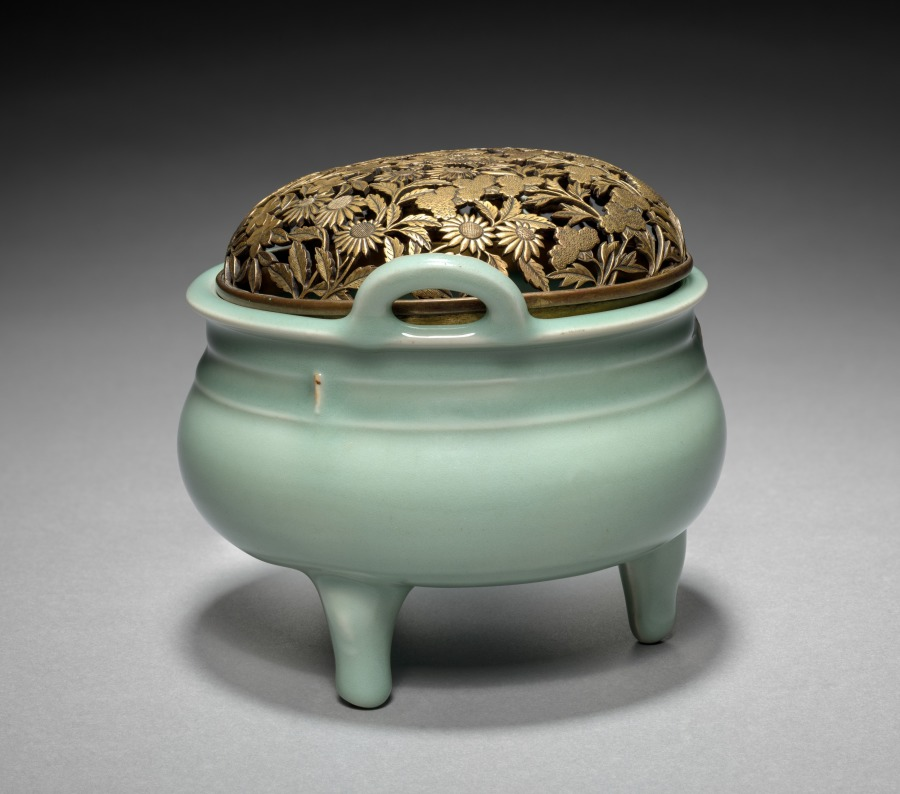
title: Covered Incense Burner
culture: Japan, Meiji period (1868–1912)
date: late 1800s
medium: Porcelain with gilt bronze cover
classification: Ceramic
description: This incense burner emulates Chinese porcelain in its glaze and form. A number of prominent Meiji-period ceramicists explored classical Chinese forms and glazes even as they also produced stoneware with Japanese-style glazes.